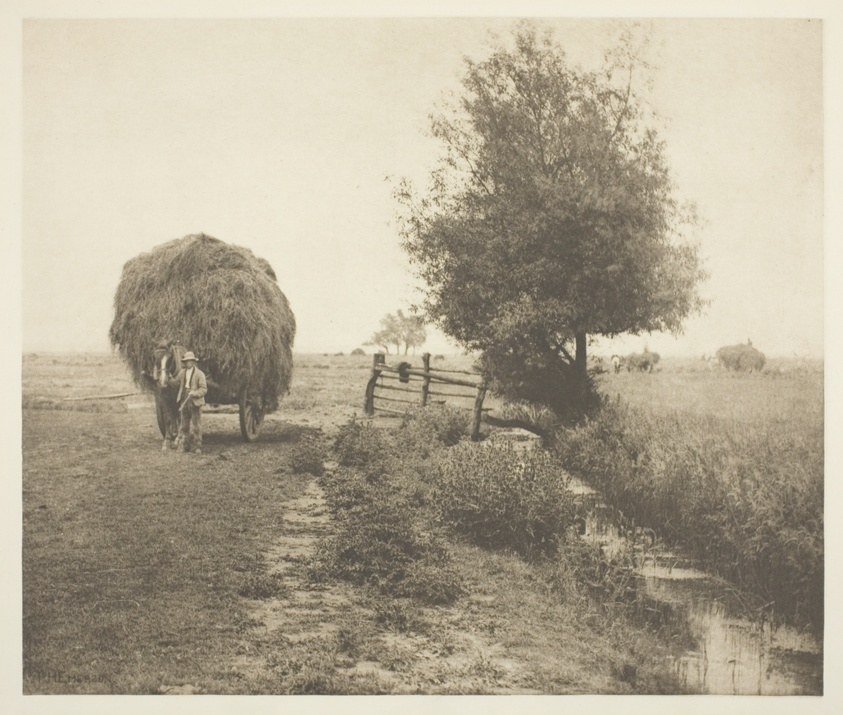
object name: Photograph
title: In the Haysel (Norfolk)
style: 19th century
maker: Peter Henry Emerson (English, born Cuba, 1856–1936); printed by Ballantyne, Hanson and Co., London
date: c. 1883/87, printed 1888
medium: Photogravure, Frontispiece from "Pictures of East Anglian Life," published by Sampson Low, Marston, Searle & Rivington (1888)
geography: England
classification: photogravure; photomechanical process; photography; photograph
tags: Collected by Hugh Edwards, Pictures of East Anglian Life, Seat of War in the Crimea